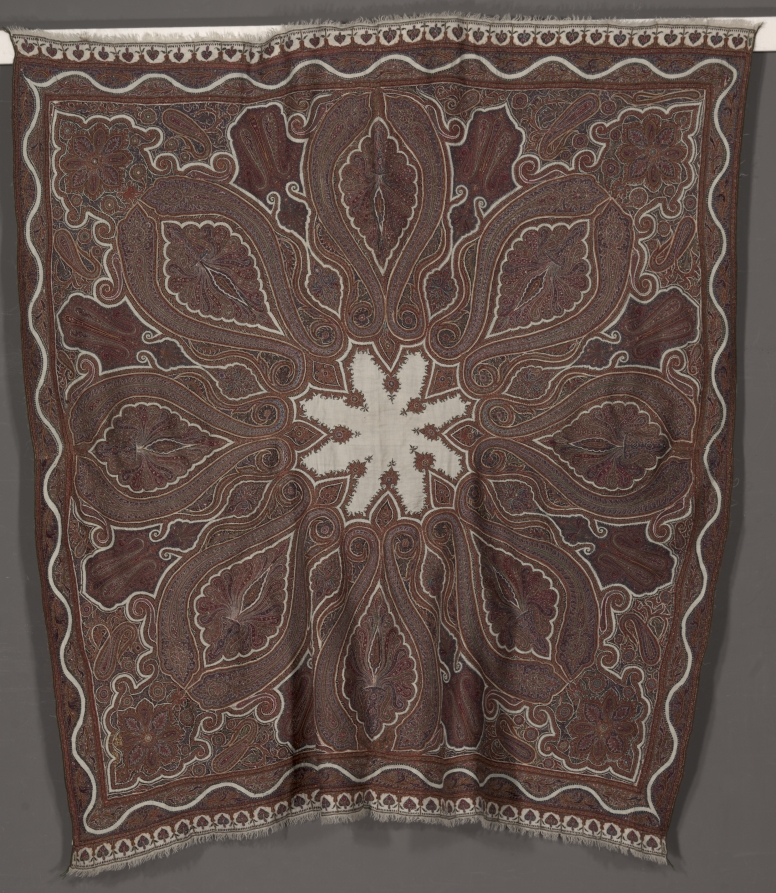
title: Square Shawl ("amli")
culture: India, Kashmir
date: mid-1800s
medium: Wool: embroidery (large-pieced areas)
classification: Embroidery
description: The central white medallion radiates into a swirling pattern of rosettes and teardrop-shaped “tree-of-life” motifs, also known as paisley, that spread over the entire surface. In the border is an undulating vine and a row of gate-like elements filled with individual trees. Kashmiri shawls were signs of high social status in India. Beginning in the late 1700s, the shawls were also coveted throughout Europe and America, until they began to fall out of fashion during the 1870s.